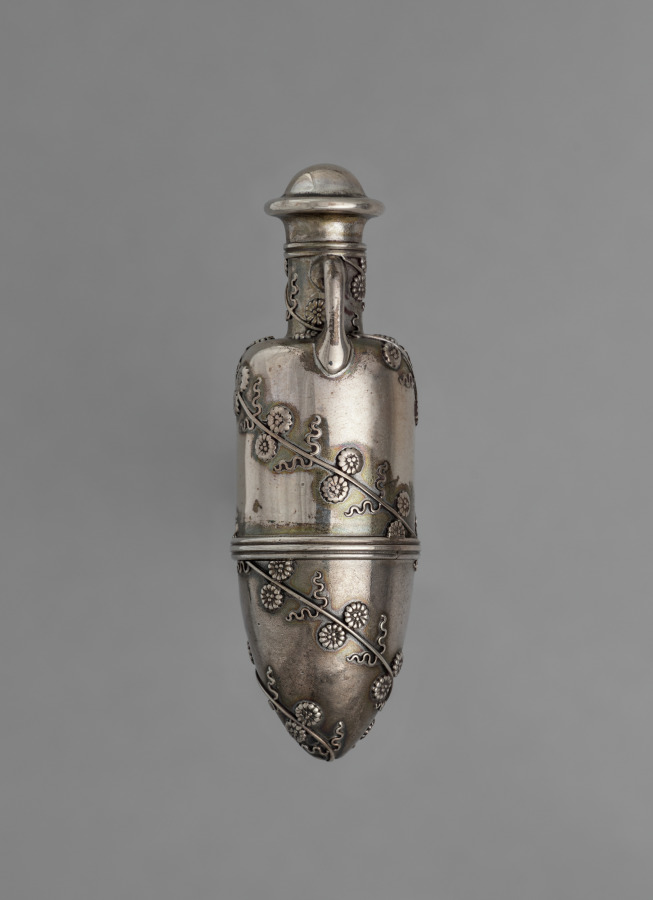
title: Scent Bottle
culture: America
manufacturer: Tiffany & Co. (America, New York, est. 1837)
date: c. 1860–70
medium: silver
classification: Silver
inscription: Inside mark: Tiffany & Co. 2662 (...) - this is too small to read M2108 Union Square